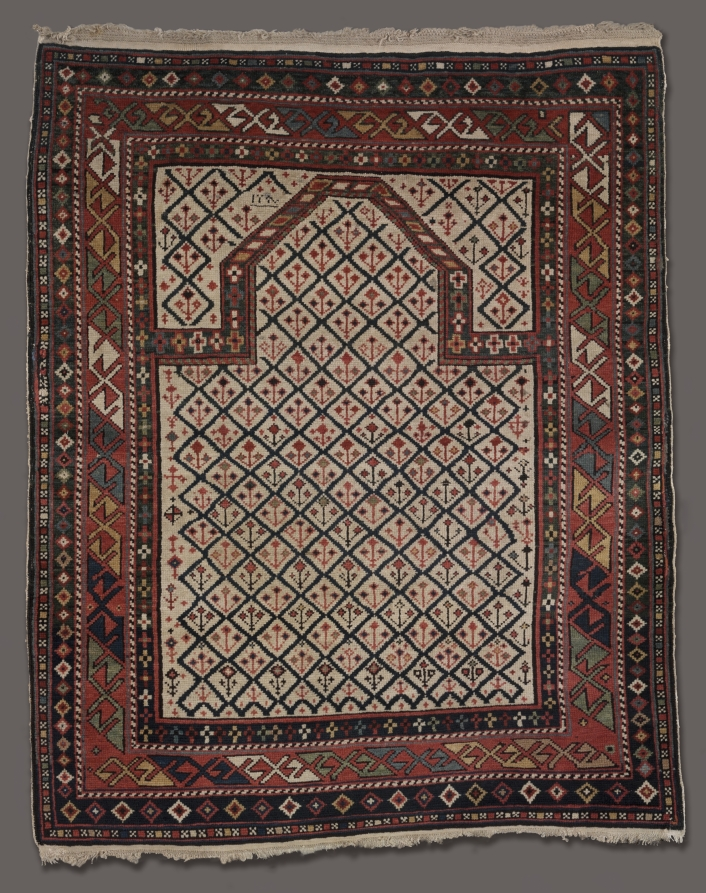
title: Prayer Rug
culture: Caucasus, Daghestan, 19th century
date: c. 1800s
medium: wool and linen; ghiordes knot, extended tabby, fringe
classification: Carpet